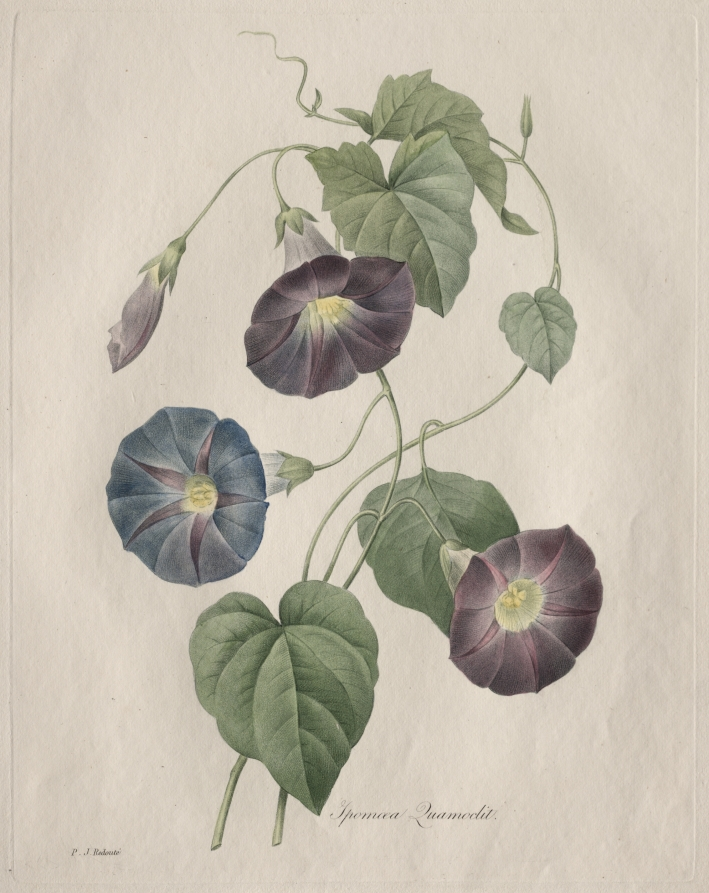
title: Star-glory Morning-glory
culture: France, 19th century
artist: Henri Joseph Redouté (French, 1766–1853)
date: 1827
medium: stipple, roulette and line engraving with hand coloring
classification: Print